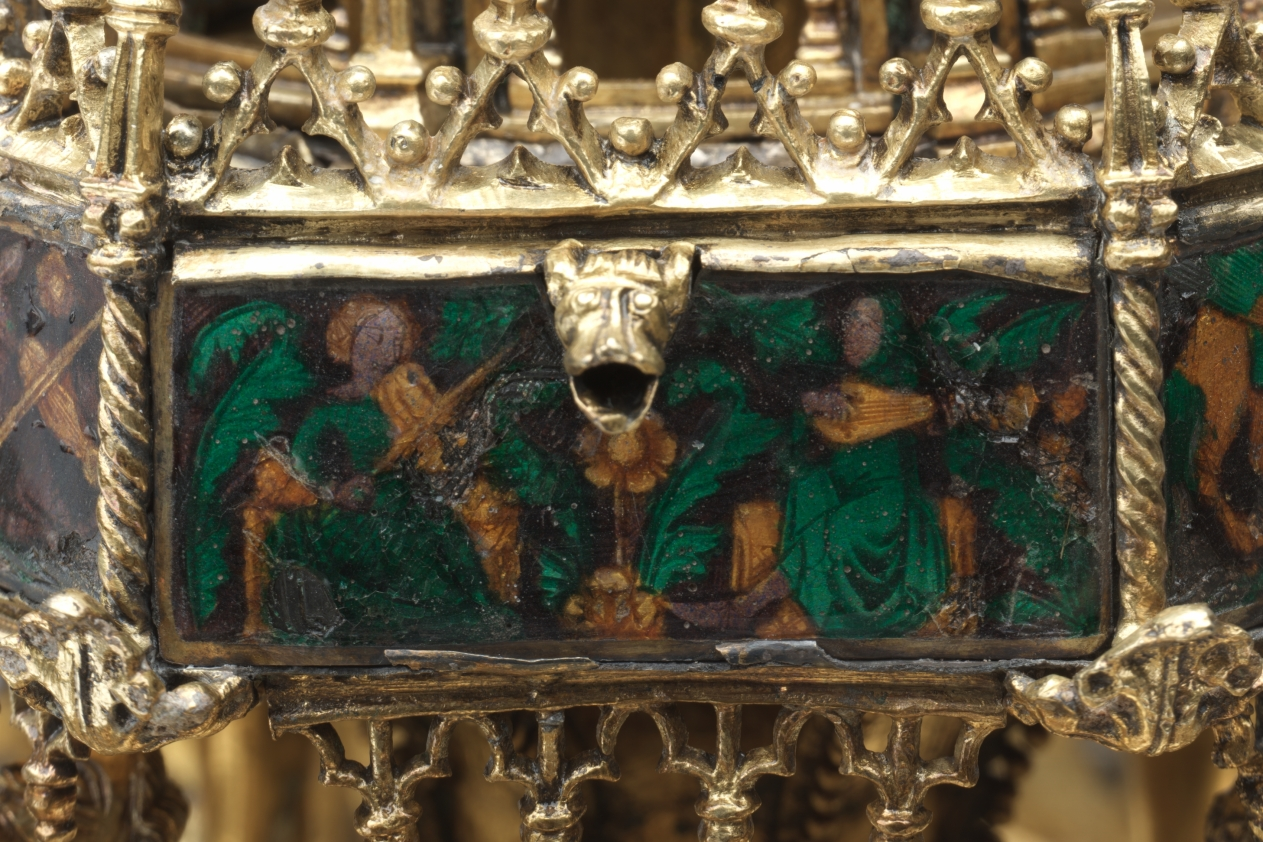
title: Table Fountain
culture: France, Paris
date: c. 1320–40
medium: gilt-silver and translucent enamels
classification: Metalwork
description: Conceptually and stylistically, this object is beyond all else a piece of Gothic architecture in miniature with vaults, pinnacles, columns, and traceried arches. Though the artist who created it is unknown, he was unquestionably inspired by the great Gothic buildings of his time. The table fountain is a three-tiered assembly combining cast elements with bent sheets of gilt-silver. To these have been attached a series of enamel plaques representing grotesque figures, some of which play musical instruments. Water wheels and bells were added to capture motion and sound. The rich detail, precious materials, and involved ornamentation of this deluxe object suggest it would have been expensive to produce and highly treasured by its original owner, someone of high status, and would have been deployed as an object of spectacle. This is the most complete example of its type known to survive from the Middle Ages. Medieval inventories reveal that small fountains like this, often taking various forms, and generally made from precious metals, once existed in large numbers, thus making the Cleveland table fountain an extremely rare object.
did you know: This fountain with its minute architectural details and finely made enamel plaques displayed the wealth and refinement of the owner as it entertained his guests. Imagine hearing the ringing of the tiny bells when this fountain was in use.